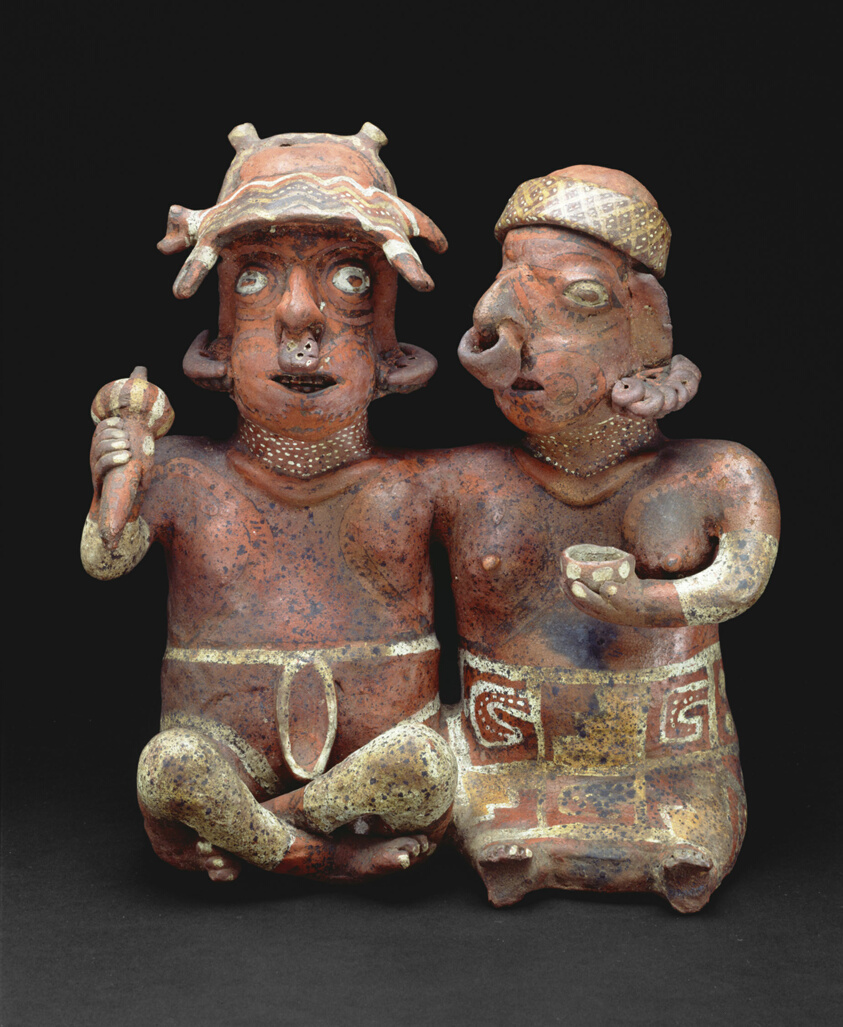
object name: Sculpture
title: Seated Joined Couple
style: nayarit, mesoamerican, Pre-Columbian, americas, west mexico, Arts of the Americas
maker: Nayarit (Nayarit, Mexico)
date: 200 BCE–300 CE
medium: Ceramic and pigment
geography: Nayarit state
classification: earthenware; art of the americas; ceramics; sculpture; funerary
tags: people, ancestors, ritual, marriages/weddings, offering, feast, musical instruments